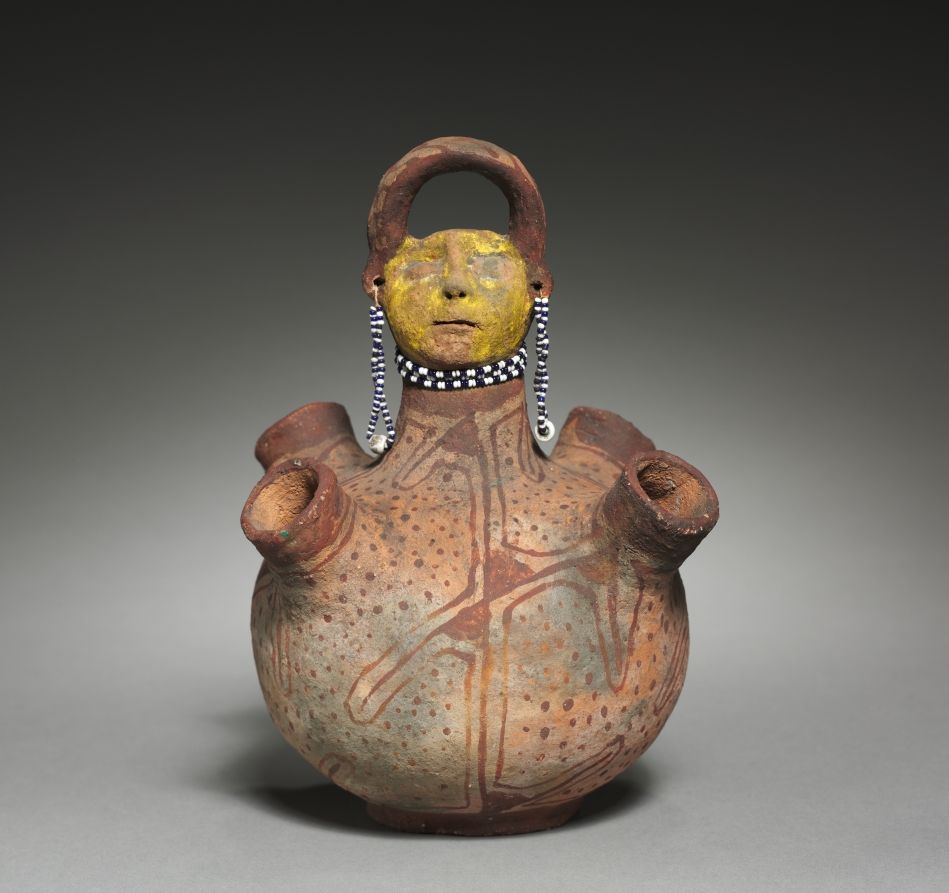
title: Vessel with Four Spouts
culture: Great Basin, Pueblo, Mojave, Post-Contact Period, early 19th century?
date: early 1800s?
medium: ceramic, pigment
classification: Ceramic